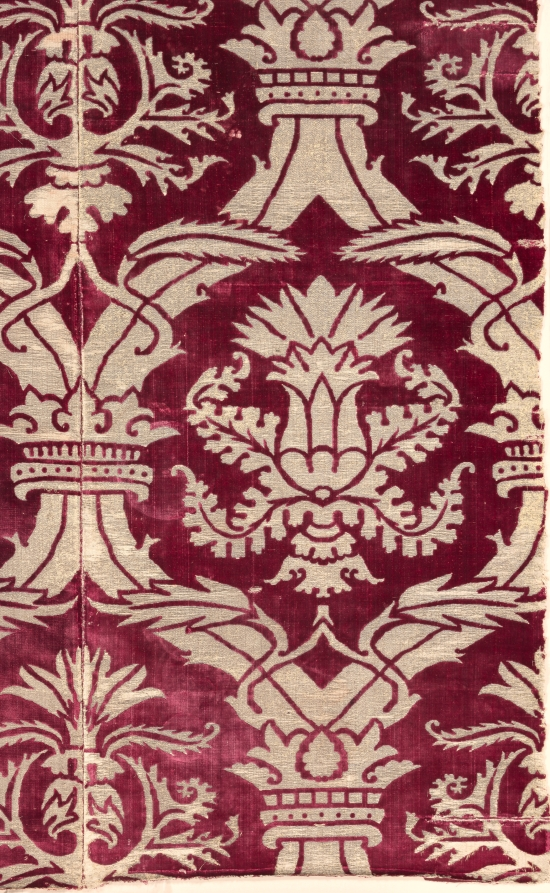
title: Brocaded Velvet Panel with Italianate Pattern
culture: Turkey, Istanbul or Bursa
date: 1575–1625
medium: Silk: velvet, brocaded; gilt-metal thread and cotton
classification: Velvet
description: Rarely are four fabric widths preserved together from any culture. This gilt-metal thread pattern combines Turkish and Italian features: the large ogival (curved) lattice clasped by crowns and the velvet structure are Turkish, and the two so-called artichoke designs are enlarged adaptations of Italian motifs. A symbol of wealth and power, this velvet panel was woven during the artistic height of the Ottoman Empire in the late 1500s. It may have covered a divan (sofa) or possibly enhanced a wall during cold winters in the imperial Topkapi Palace in Istanbul.